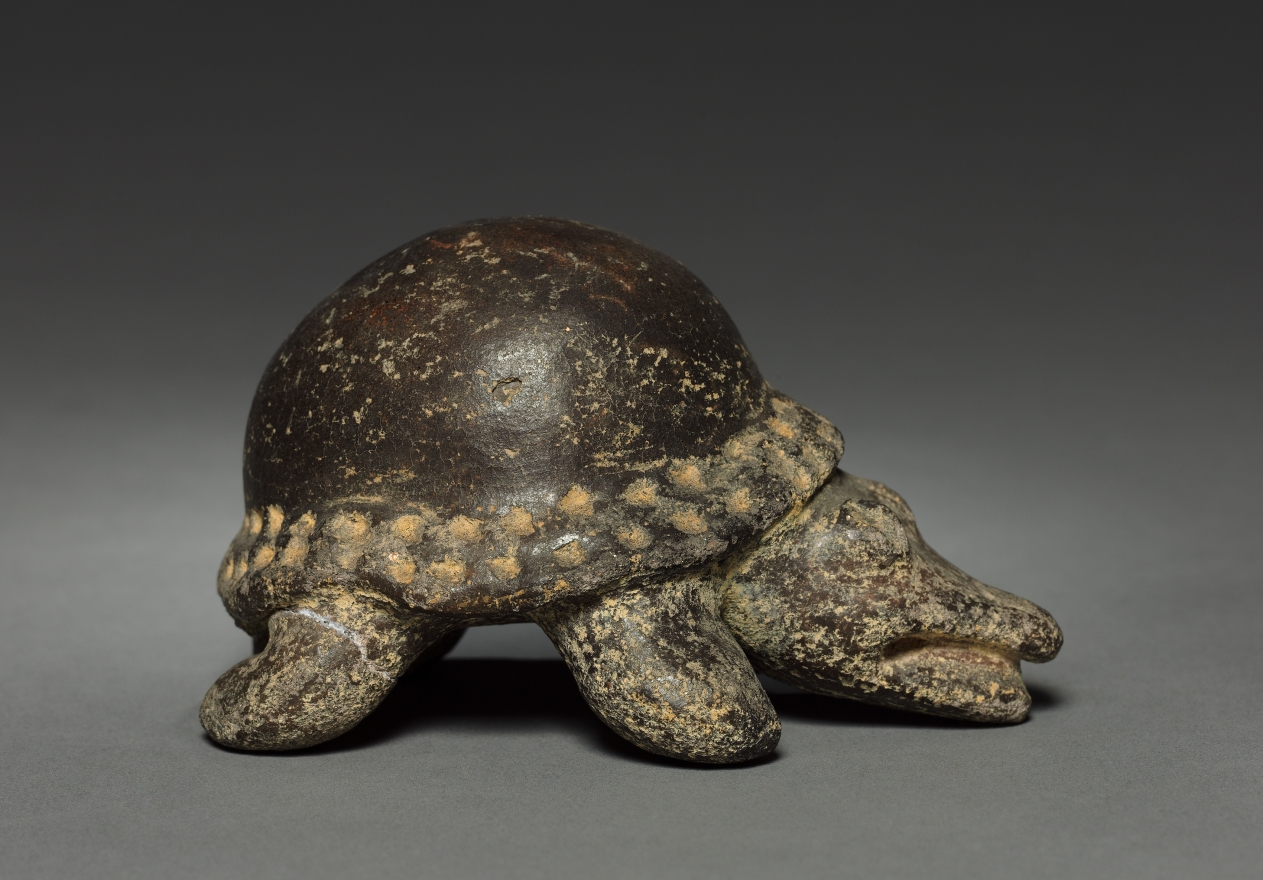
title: Turtle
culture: Colombia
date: before 1921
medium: pottery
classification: Ceramic